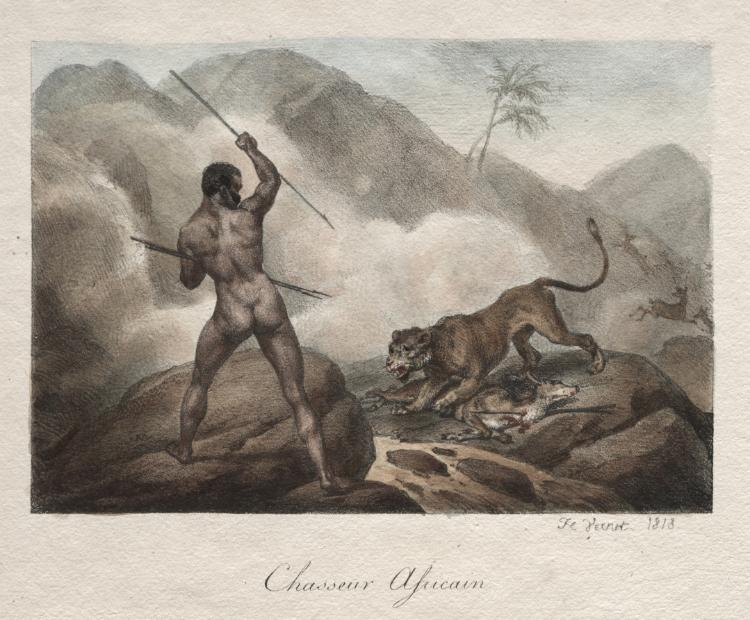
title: African Hunter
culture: France, 19th century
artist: Horace Vernet (French, 1789–1863)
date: 1818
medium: lithograph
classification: Print